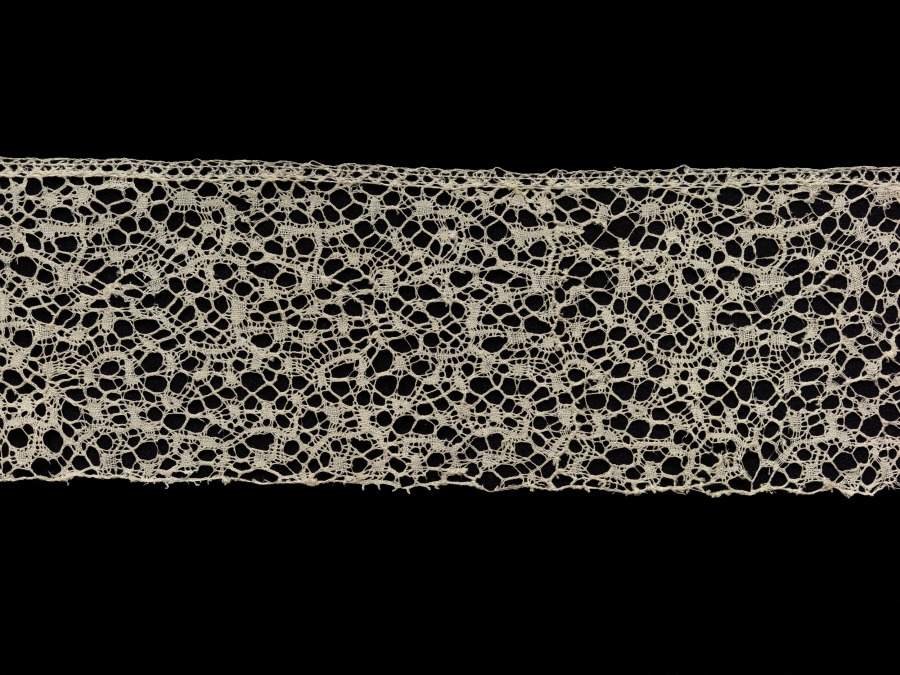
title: Lace Insertion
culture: Belgium, Binche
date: 1700s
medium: Bobbin lace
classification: Lace